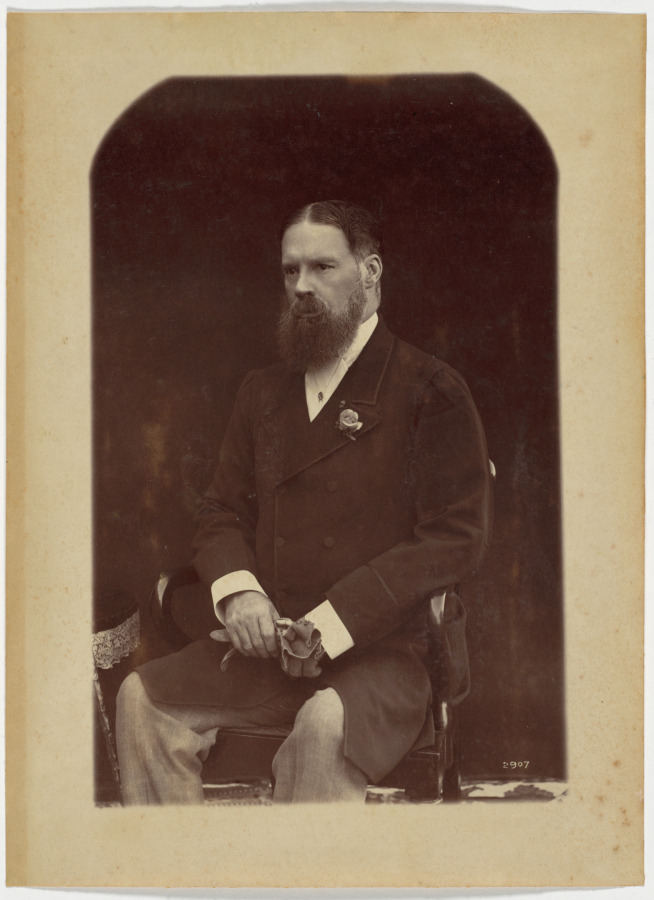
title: Portrait of a Gentleman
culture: India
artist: Raja Deen Dayal (Indian, 1844–1905)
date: 1887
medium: albumen print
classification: Photograph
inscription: No visible inscriptions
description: Two studio portraits of this sitter were included in the album; the other one was acquired by the Museum Rietberg in Zurich, Switzerland. Neither photograph was captioned, and the sitter remains unidentified. He almost certainly commissioned these two portraits and may be the person who ordered and chose the images for the album. Its owner would not need to label their own likeness. However, many who create albums do just that to ensure they are known to future generations of viewers.